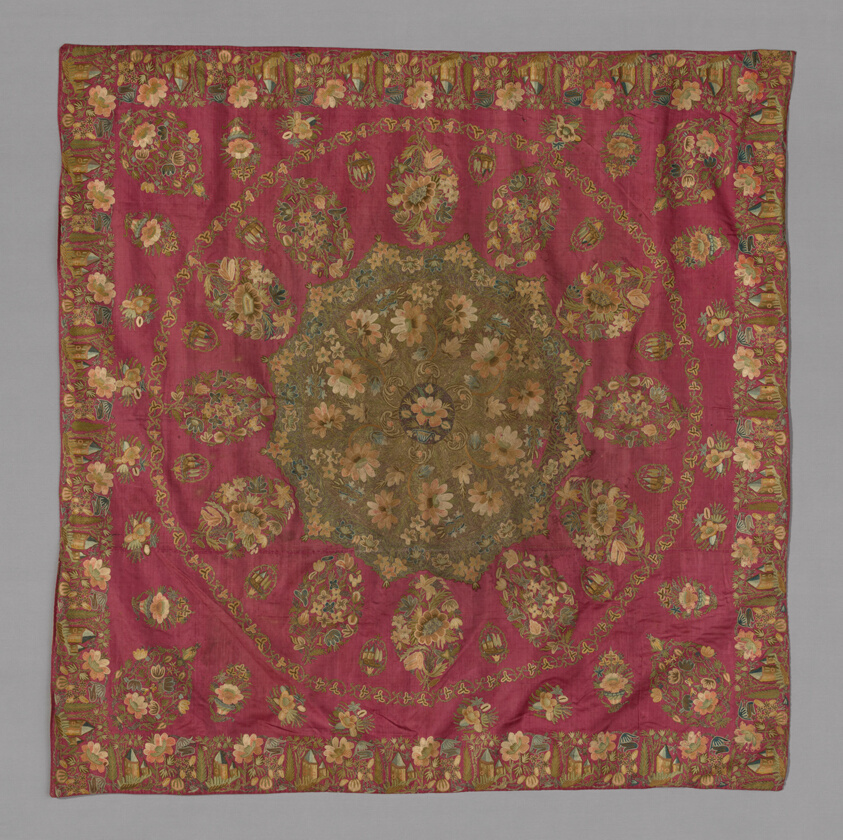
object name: Textile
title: Cover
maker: Turkey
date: 18th century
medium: Embroidered with polychrome silk, gold, and silver in chain stitch on plain rose silk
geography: Turkey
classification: textile; needlework (visual works); weaving